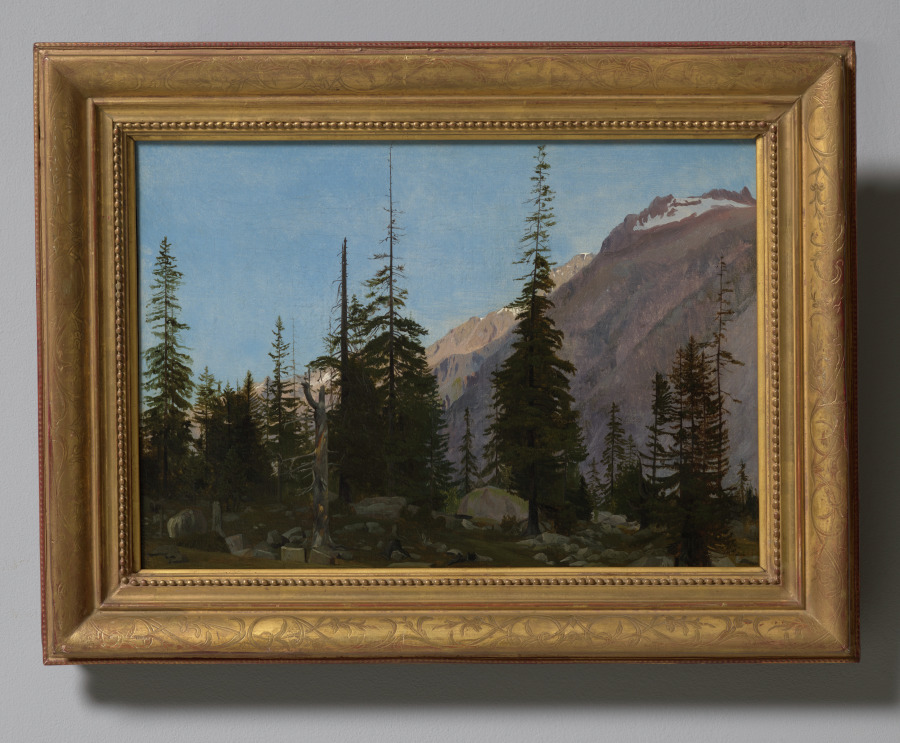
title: Alpine Landscape: The Handegg, Switzerland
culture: France, 19th century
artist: Jean-Léon Gérôme (French, 1824–1904)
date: 1850s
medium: oil on fabric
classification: Painting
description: This painting depicts a mountain peak near Handegg, a village just south of Lucerne, Switzerland. Tall fir trees reach upward from the dark foreground toward the light, which illuminates the sky and snowcapped mountains. Rising like church steeples, the trees almost touch the top of the canvas, conveying a feeling of spiritual striving. This expression of romantic, almost religious sentiment inspired by the power and beauty of nature is surprising for Gérôme, one of the leading artists of academic realism, a style distinguished by firm, precise drawing­.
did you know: In 1851, Gérôme decorated a vase for Emperor Napoleon III of France which was offered to Prince Albert of England and is now part of the Royal Collection at St. James’s Palace, London.